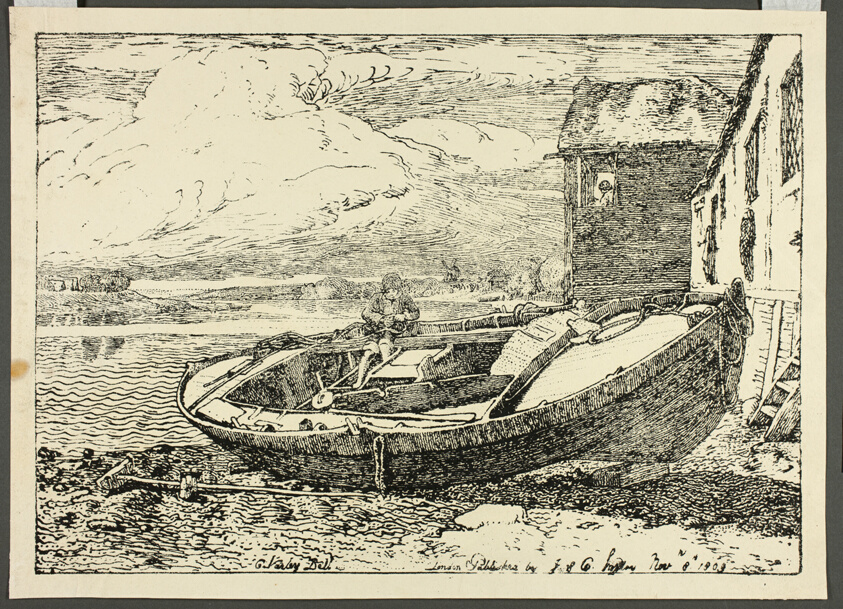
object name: Print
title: A Boy Sitting on a Banked Vessel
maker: Cornelius Varley (English, 1781-1873); published by John Varley (English, 1778-1842) and Cornelius Varley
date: November 8, 1809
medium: Pen lithograph on cream wove paper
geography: England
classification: lithograph; print; prints and drawing